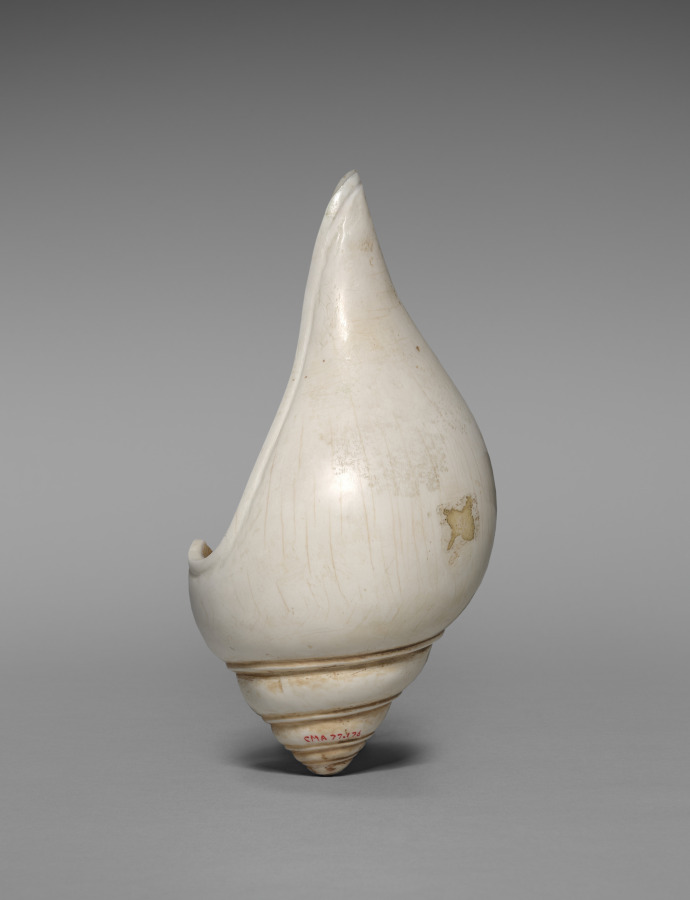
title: Ritual conch shell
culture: Cambodia, Khmer, Angkor Period, 12th-13th Century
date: 1100s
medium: shell and bronze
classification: Sculpture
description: A royal temple like Banteay Chhmar was built for performing rituals and to honor images of gods, Buddhas, and other sacred or enlightened beings for the sake of the kingdom’s protection and ongoing prosperity. Conch shells were blown at the start of rituals to make the sound corresponding to the syllable om. The dancing figure of Hevajra, a Buddhist being of enlightenment with eight heads, sixteen arms, and four legs, has been worked into the bronze embellishment of the shell. Hevajra was elevated to a prominent position in Khmer Buddhism of the Angkorian period as the standard figure denoting the practice of rituals prescribed in a text called the Hevajra-tantra. The tripod stand with three serpents is probably not original to the shell.